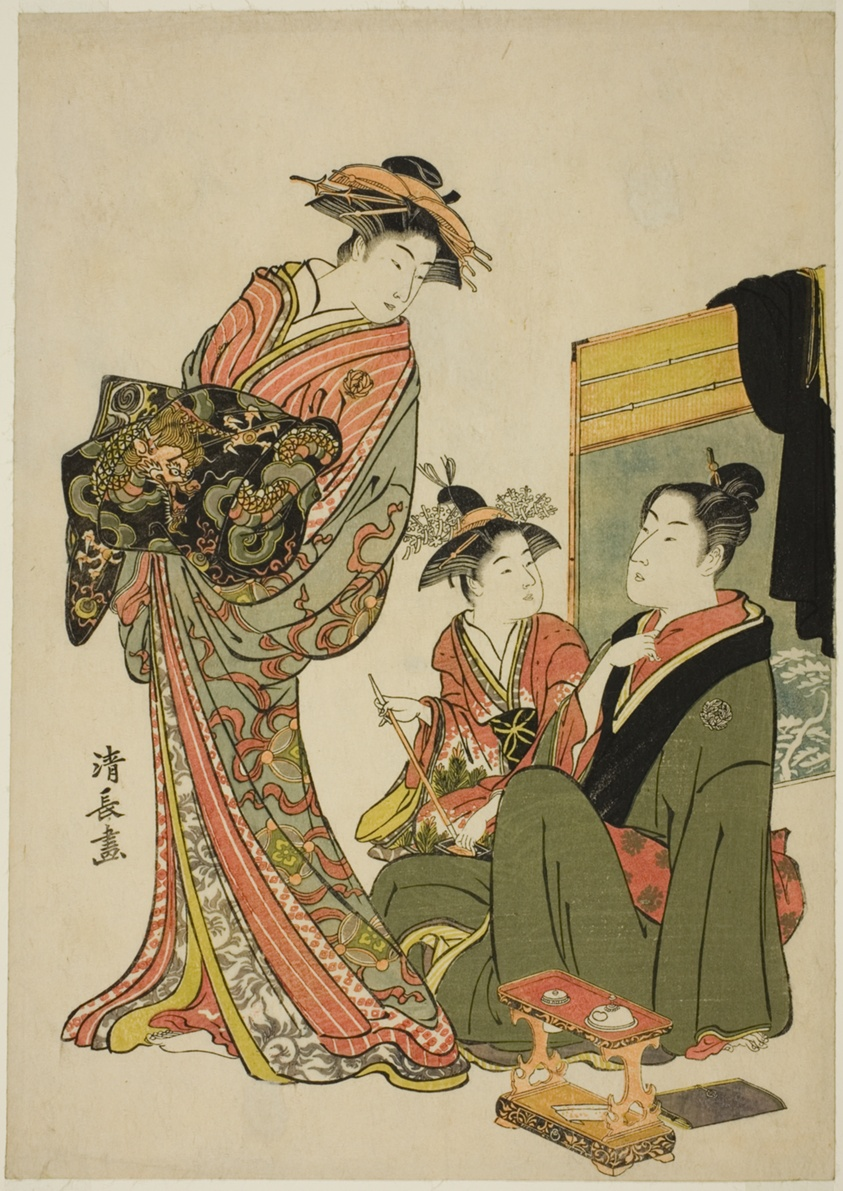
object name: Print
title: The Actor Nakamura Riko with a courtesan, from an untitled series of aiban prints depicting Actors in private life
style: Japanese (culture or style)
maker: Torii Kiyonaga (Japanese, 1752-1815)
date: c. 1781/82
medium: Color woodblock print; aiban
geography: Japan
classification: woodblock print; print; asian art